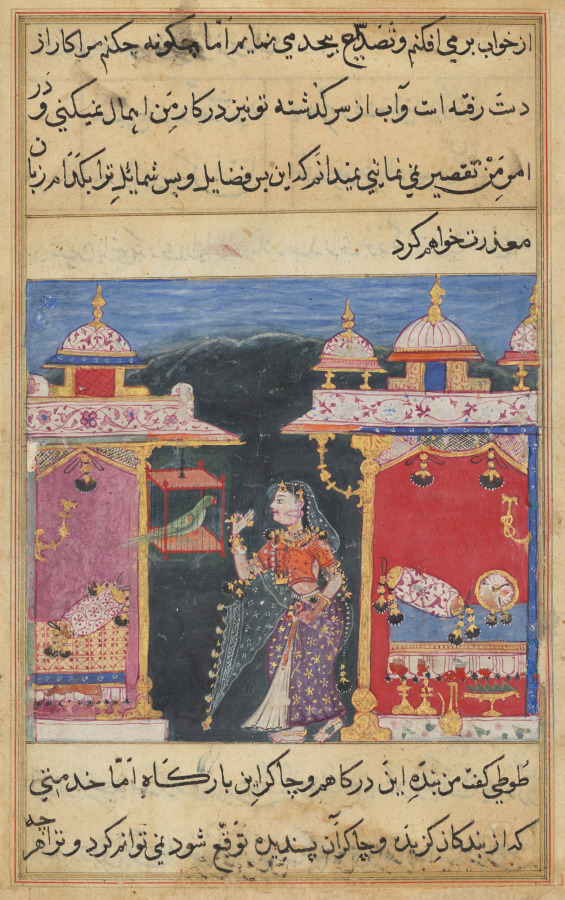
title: The Parrot Addresses Khujasta at the Beginning of the Seventh Night, from a Tuti-nama (Tales of a Parrot)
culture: Mughal India, court of Akbar (reigned 1556–1605)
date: c. 1560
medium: gum tempera, ink, and gold on paper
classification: Painting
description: Every night for 52 nights the sly domesticated parrot encourages his master’s wife Khujasta to meet her lover under cover of darkness. Just before she leaves, the parrot mentions a topic from a tantalizing tale; she becomes so curious that she cannot go out before hearing the whole story. By the time the story ends, dawn breaks, and it is too late for her to go out unnoticed. The artist who painted this page was still firmly entrenched in the idioms of pre-Mughal painting.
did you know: This miniature displays an intermingling of various pre-Akbar idioms in the Mughal atelier.